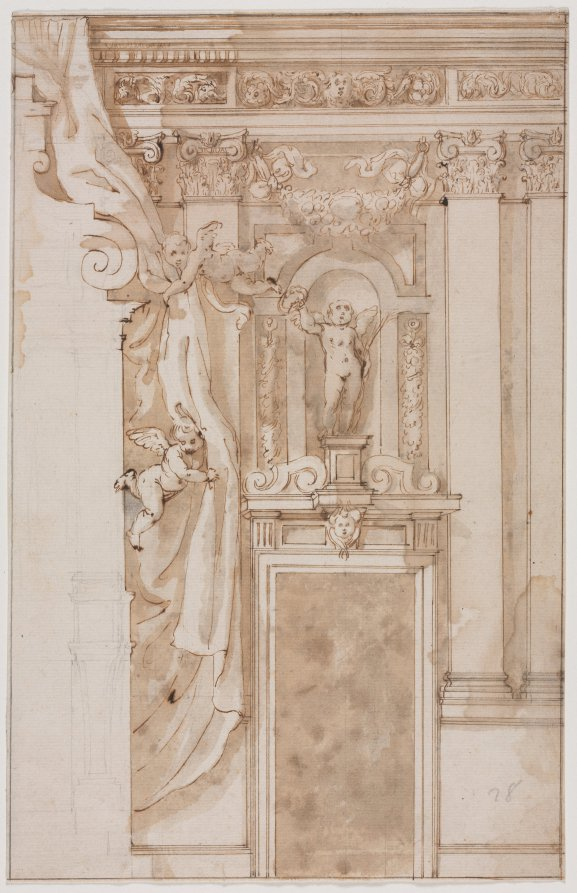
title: Elevation for Wall Decoration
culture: Italy, 16th century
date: c. 1550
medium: pen and brown ink (ruled in places) and brush and brown wash with graphite and graphite wash; framing lines in brown ink and graphite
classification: Drawing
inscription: lower right, in graphite: [2?]8 ; VERSO, lower center, in graphite: 14 ; lower right, in graphite: A. 3935 / T/A/-